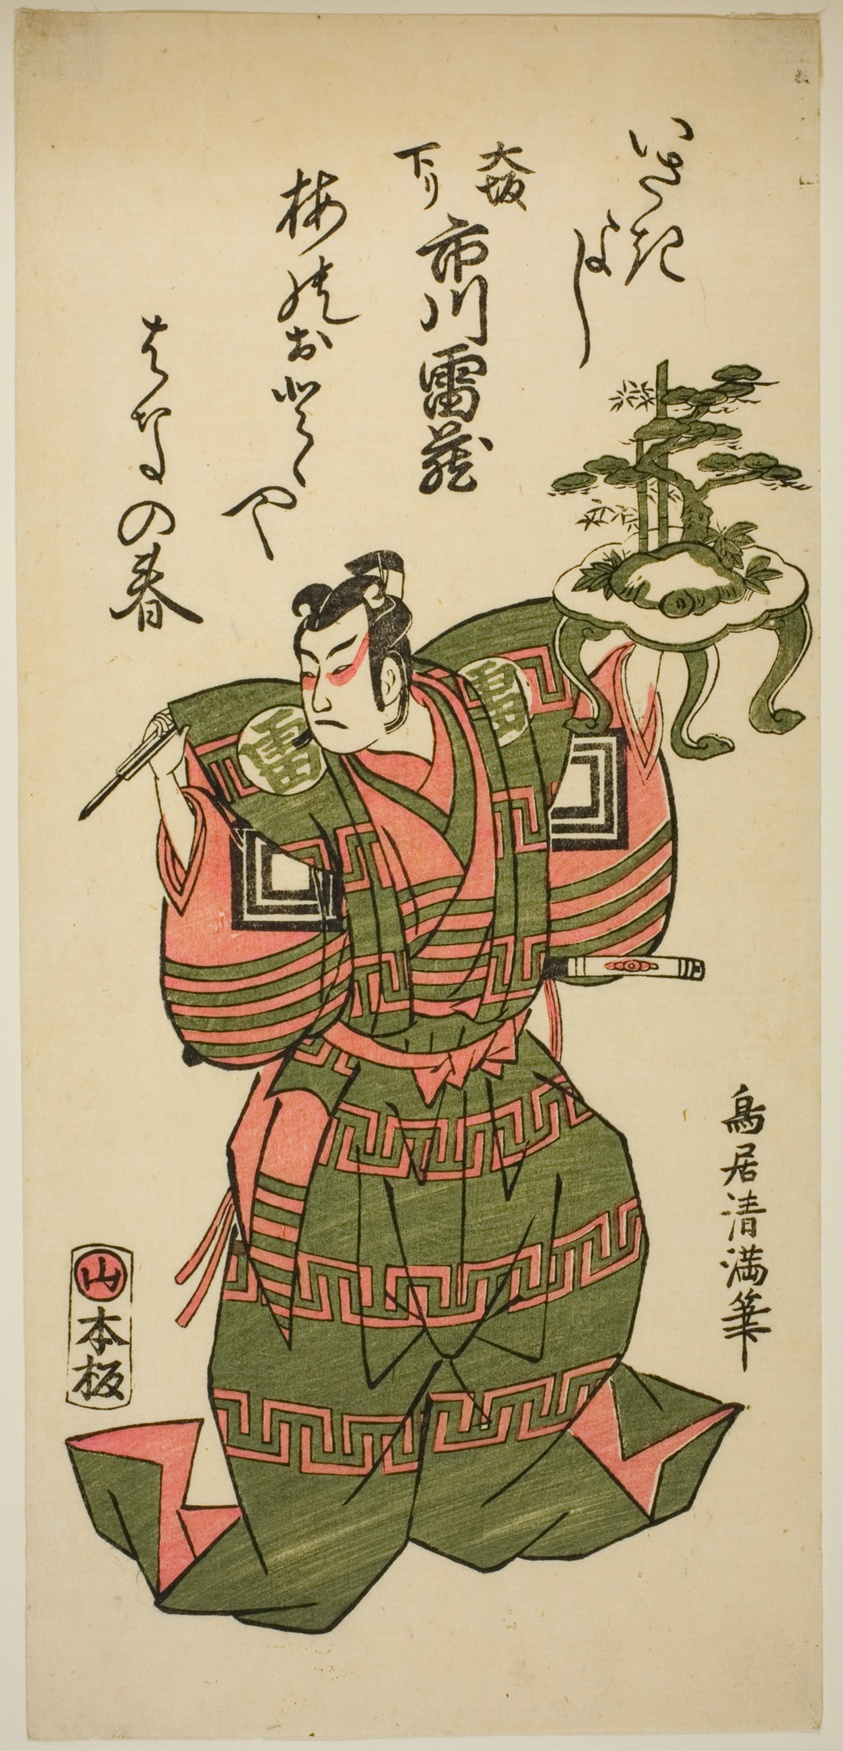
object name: Print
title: The Actor Ichikawa Raizo I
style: Japanese (culture or style)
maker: Torii Kiyomitsu I (Japanese, 1735–1785)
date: 1761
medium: Color woodblock print; hosoban, benizuri-e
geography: Japan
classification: woodblock print; print; asian art